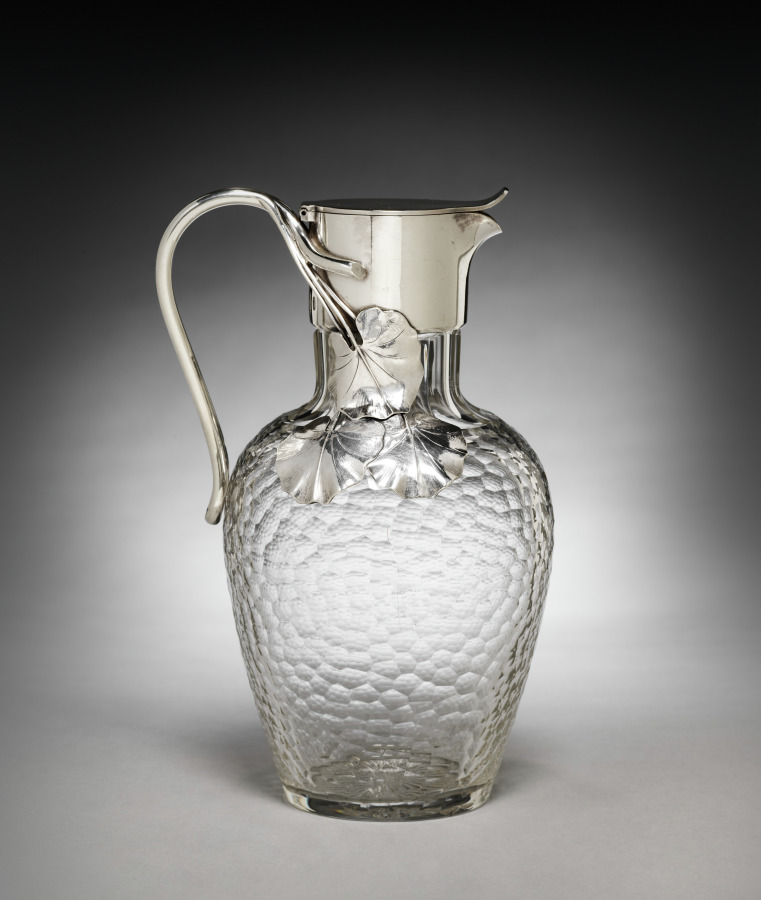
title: Jug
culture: Russian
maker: House of Fabergé (Russian, 1842–1918)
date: 1895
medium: silver, cut glass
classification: Glass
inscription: "K. Faberge" in Cyrillic, surmounted by the double-headed Imperial eagle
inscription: "88" silver standard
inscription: St. Peterburg coat of arms (St. George and the dragon)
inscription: Cyrillic initials "AC"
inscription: "1895"